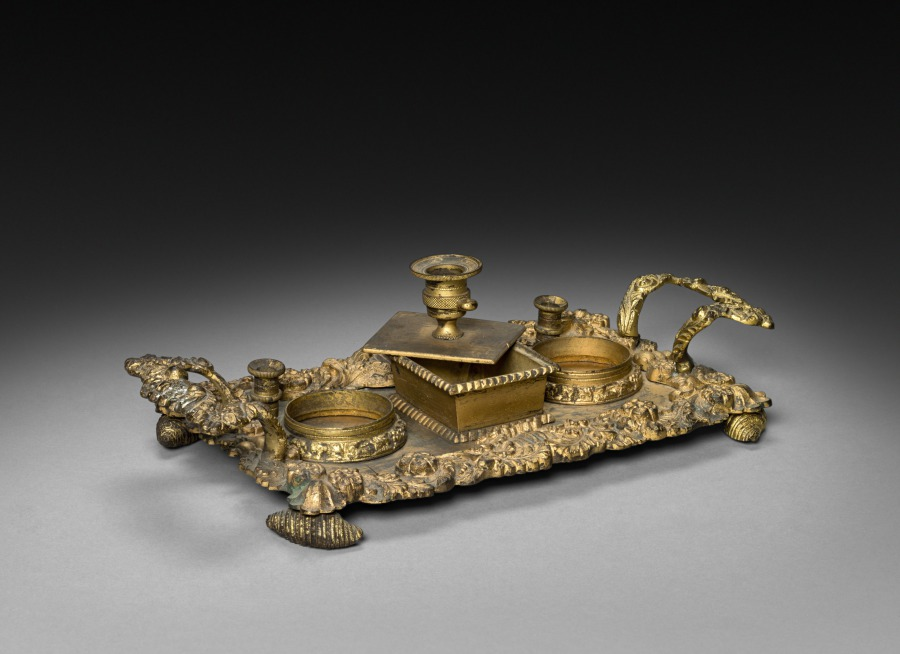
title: Inkwell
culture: England or America, 19th century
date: 1825–1850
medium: gilt bronze and glass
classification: Metalwork